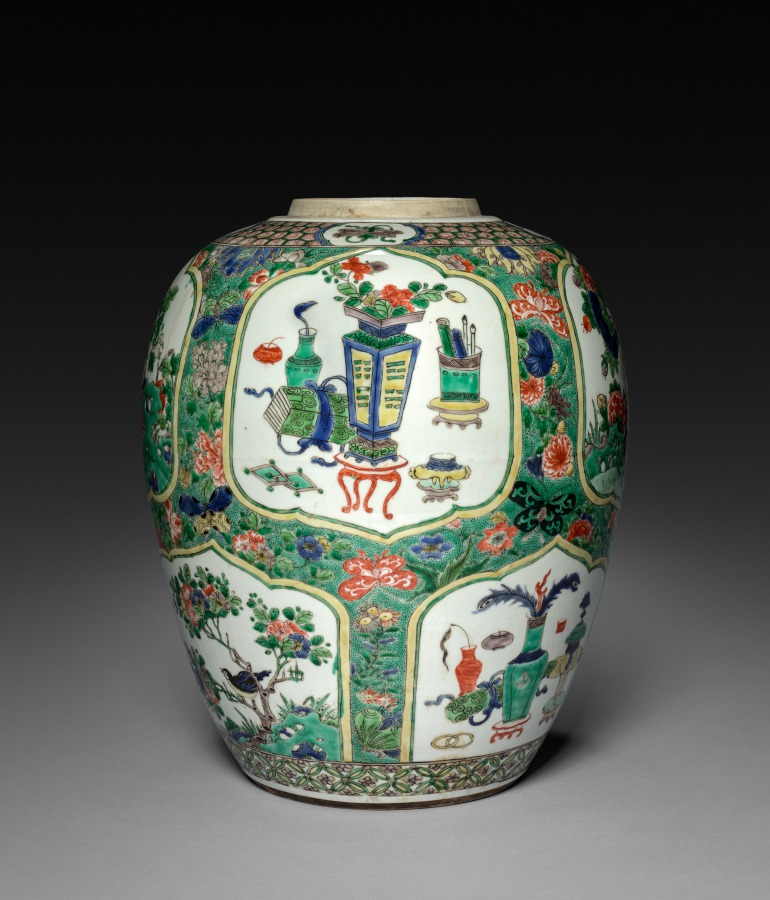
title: Vase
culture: China, Qing dynasty (1644-1911), Kangxi reign (1661-1722)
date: 1622–1722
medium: porcelain with underglaze decoration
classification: Ceramic